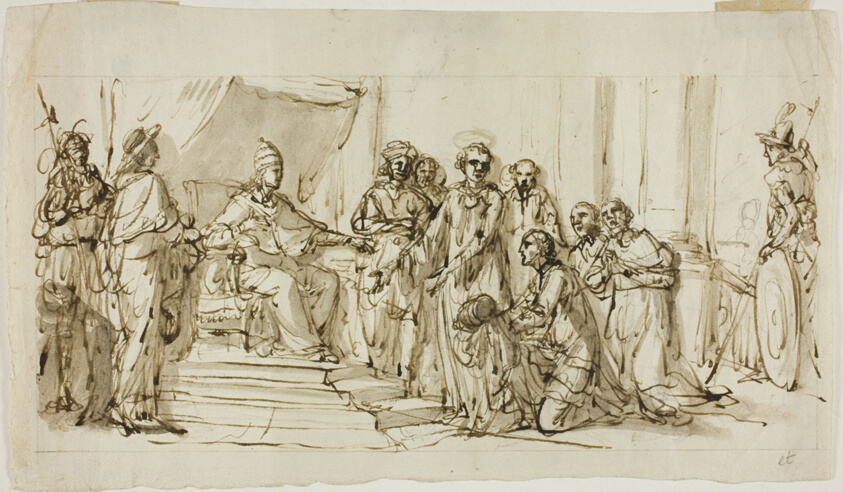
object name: Drawing and Watercolor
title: Papal Audience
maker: Possibly Domenico Pozzi; Italian, 1744-1796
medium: Pen and brown ink, with brush and gray-brown wash, over black chalk on ivory laid paper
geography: Italy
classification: pen and ink drawings; drawings (visual works); prints and drawing